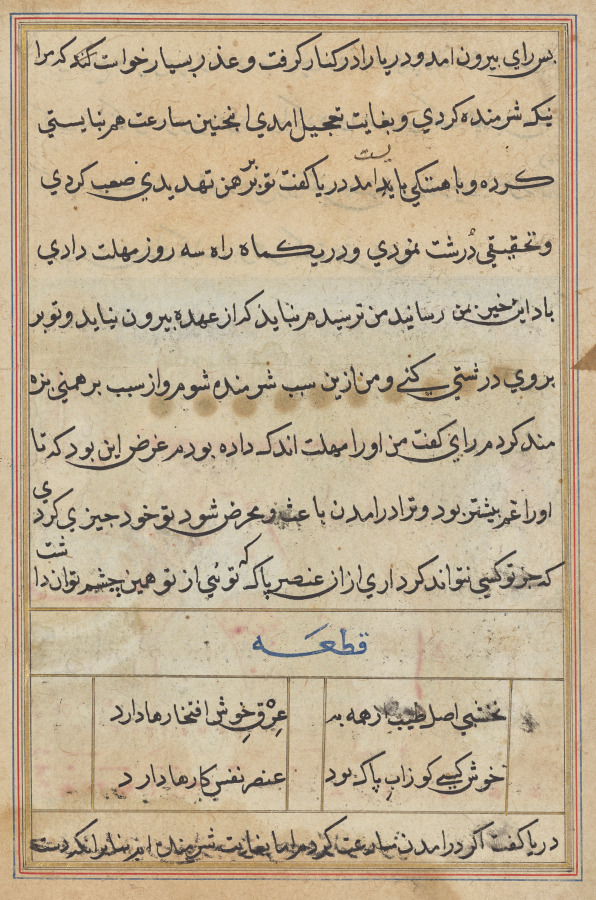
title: Tuti-Nama (Tales of a Parrot)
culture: Mughal India, court of Akbar (reigned 1556–1605)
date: c. 1560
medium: gum tempera, ink, and gold on paper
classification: Painting